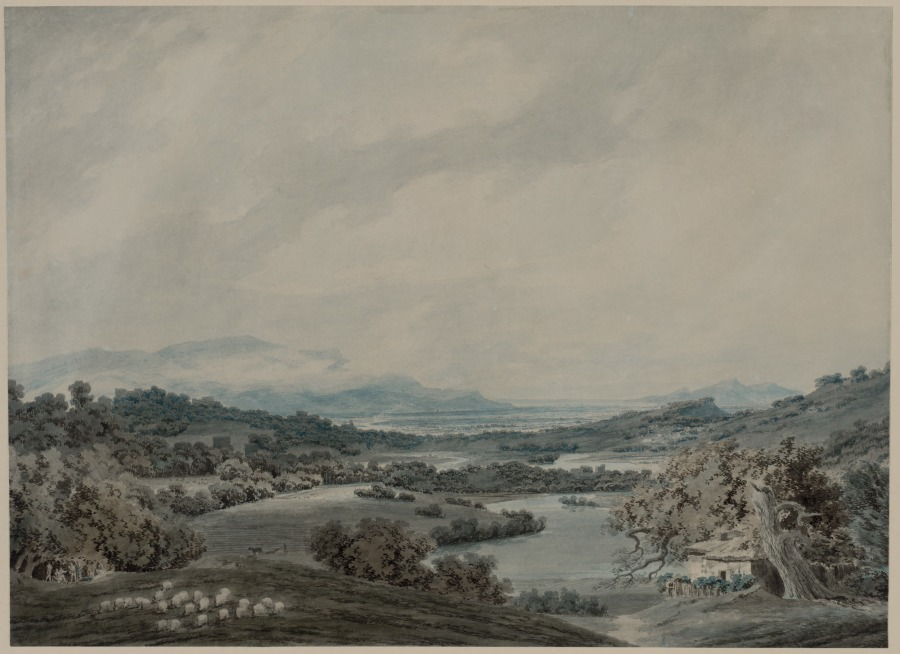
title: Italian Landscape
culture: England, London, 18th century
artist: John Robert Cozens (British, 1752–1797)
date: c. 1790–92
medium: watercolor over graphite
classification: Drawing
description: During the 18th century, views of Italy and the Continent were in great demand among British aristocrats on the Grand Tour. Cozens journeyed to Italy and Switzerland twice in his career, making pencil and wash sketches from which he later derived highly finished watercolors for various patrons. The artist’s somber palette, limited to muted greens, grays, and blues, produces a melancholy, hazy effect in this landscape. The site depicted here has thus far proved unidentifiable and may be an amalgamation of memory and imagination. The left portion of the composition relates to another watercolor depicting a view of Velletri, a town outside of Rome; the cottage and trees in the right foreground seem English, and the central plain and winding river appear to be pure invention.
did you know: John Robert Cozens's watercolors became widely known after the doctor who treated him during a mental breakdown in 1794 enlisted two other artists to produce copies for circulation.